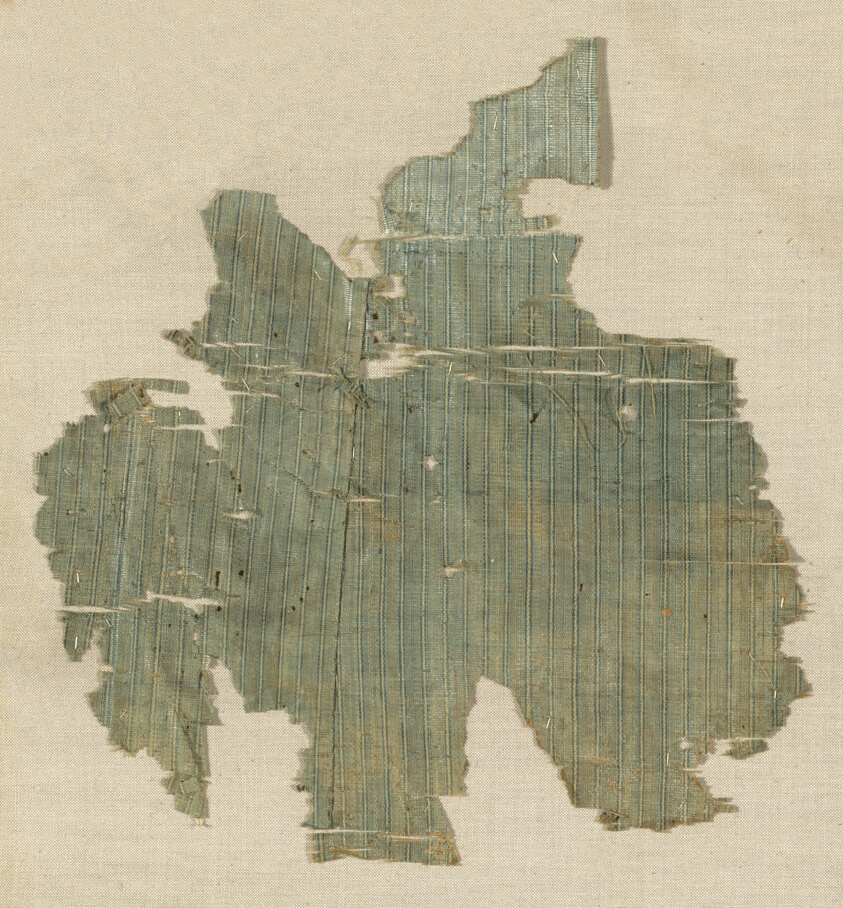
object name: Textile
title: Fragment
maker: Egypt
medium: Silk, compound weave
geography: Egypt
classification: textile; weaving